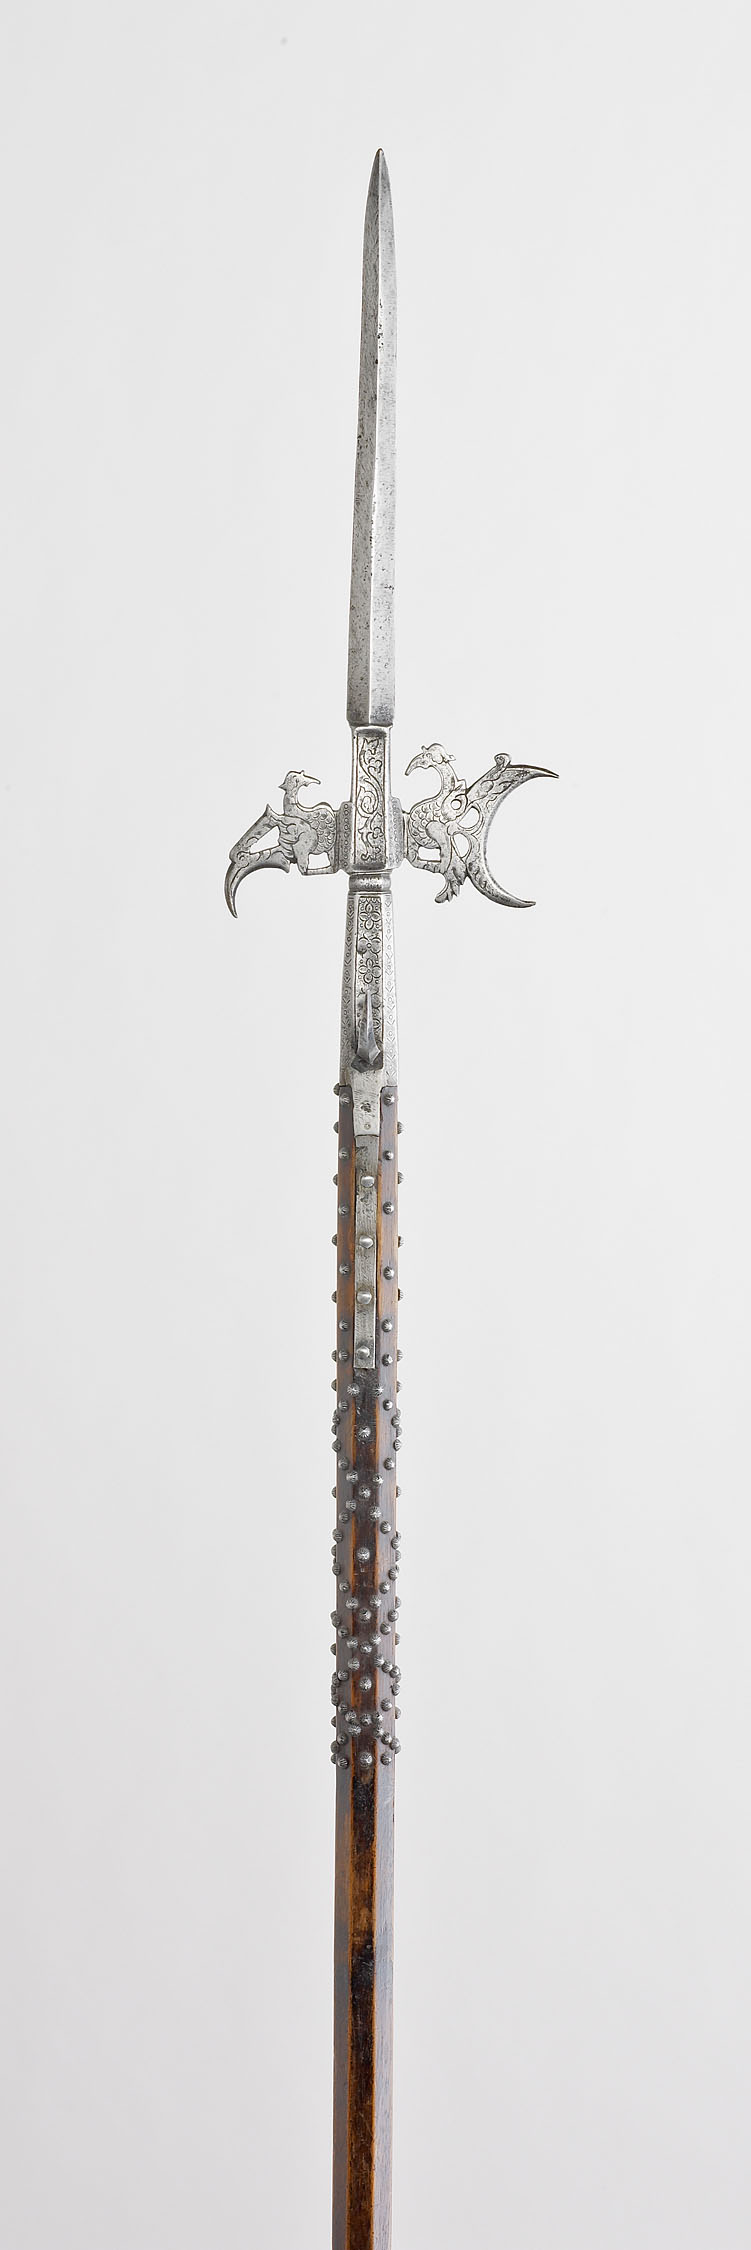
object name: Arms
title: Halberd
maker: Flemish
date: 1620/50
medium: Steel, iron, and wood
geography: Flanders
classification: edged weapon-staff; arms; arms and armor